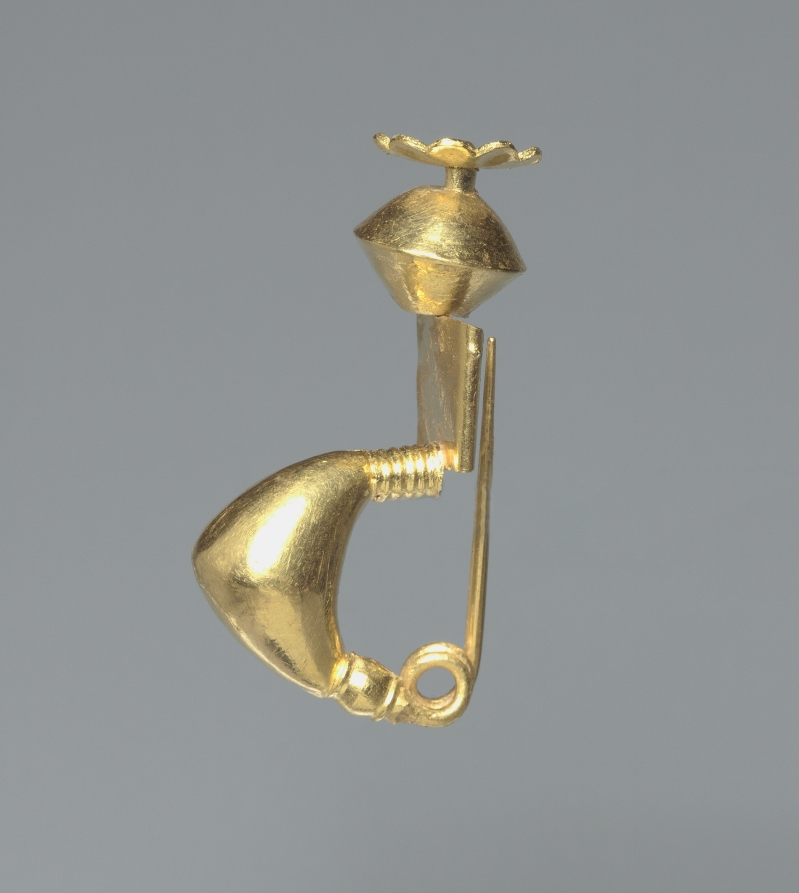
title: Fibula (Pin)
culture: South Italy, Campania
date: 400–200 BCE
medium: gold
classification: Jewelry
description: This extravagant fibula, likely used to fasten garments, is decorated with gold rosettes and vines. An enormous leech-shaped bow and pin form the body of the fibula. A band of rosettes adorns the center of the bow. Above the bow, a gold plaque is adorned with an eight-petaled flower and palmette filigree. A gold bead, perhaps representing a pomegranate, tops the plaque. The bead is crowned with oblong petals and sprouting leaves.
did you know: This fibula’s elaborate surface includes soldered gold wire and granulated spheres.